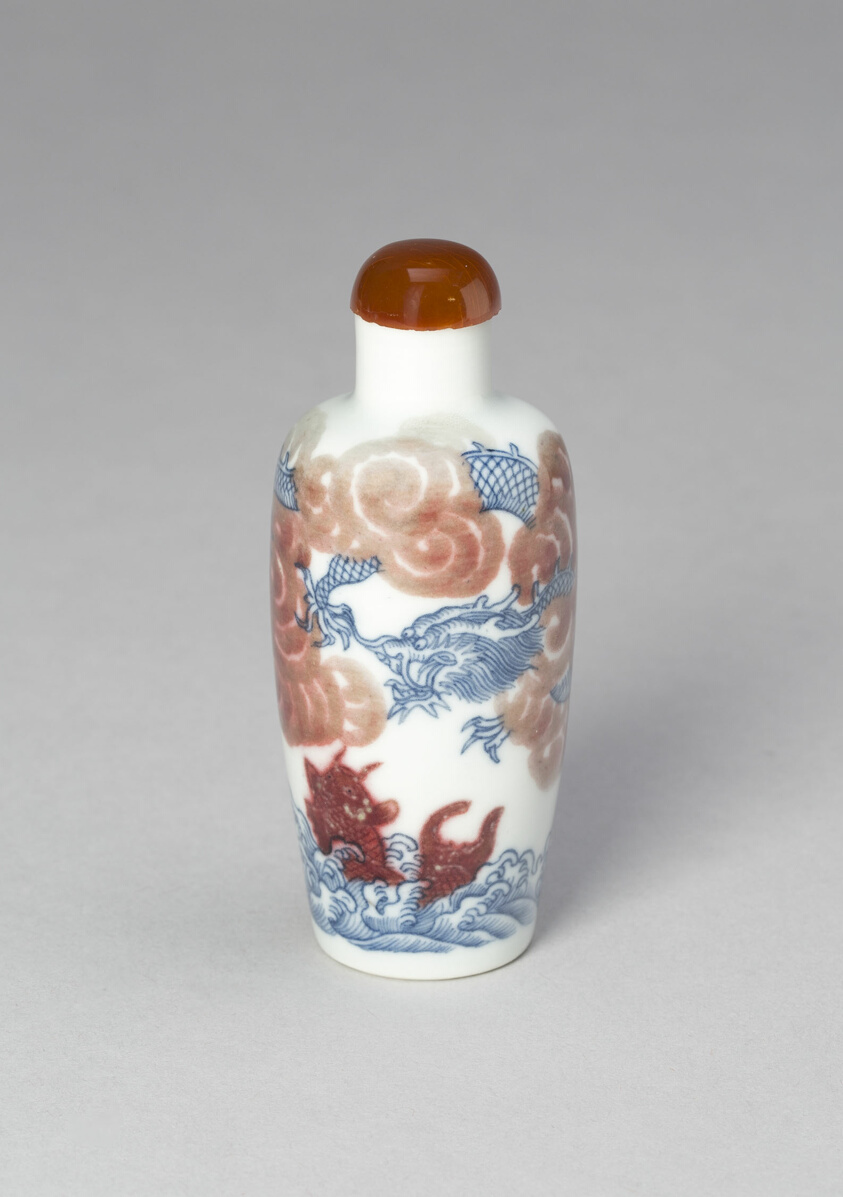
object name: Vessel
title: Snuff Bottle with a Dragon and a Carp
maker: China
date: Qing dynasty (1644–1911), 19th century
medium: Porcelain painted in underglaze cobalt blue and copper red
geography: China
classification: snuff bottle; ceramics; asian art; vessel